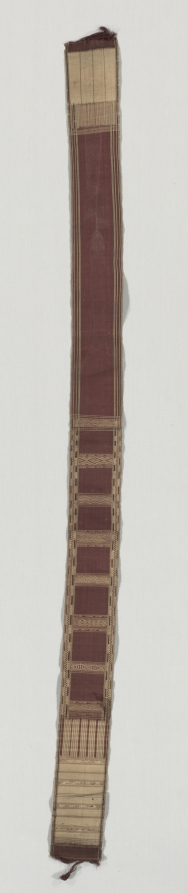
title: Woman's Sash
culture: Oceania, Micronesia, Caroline Islands, Early 20th century (?)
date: c 1900s ?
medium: dyed plantfiber; plain weave, twill weave and floats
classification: Garment